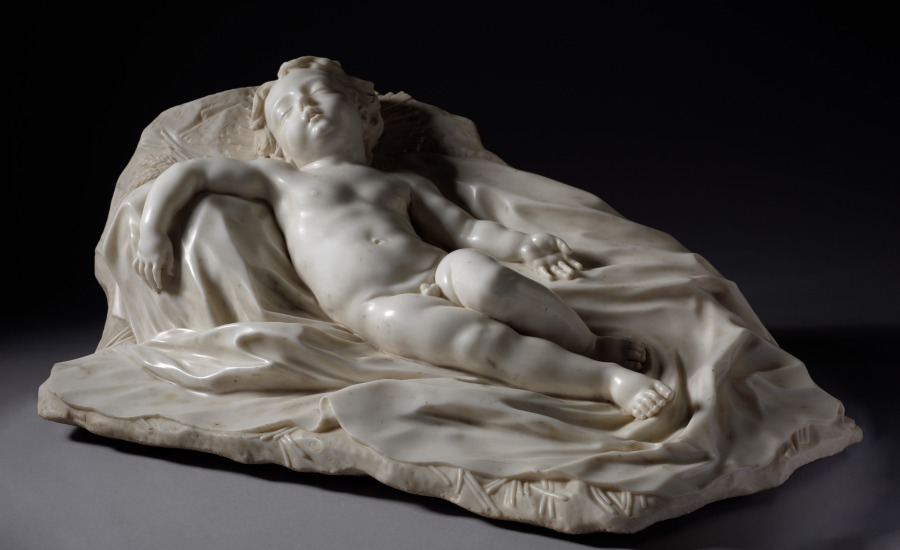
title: Sleeping Christ Child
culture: Italy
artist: Filippo Parodi (Italian, 1630–1702)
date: c. 1675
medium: marble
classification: Sculpture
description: Christ—no longer an infant, but a young child—sprawls on a bed of straw, his head thrown back in slumber and his right arm dangling. The simple radiance framing his head indicates his divinity. Representations of the sleeping Christ child were enduringly popular, not only because of the subject’s inherent charm, but sleep, as a metaphor for death, encouraged pious Christians to meditate on Christ’s humanity and his eventual suffering and death. Filippo Parodi’s Sleeping Christ Child beguiles with lifelike detail. Parodi used varying degrees of polish to differentiate surface textures: Christ’s body is burnished to a soft gleam, while his hair and the straw are more roughly carved, absorbing rather than reflecting the light. Parodi exploited the sensuous and tactile possibilities of the marble to enhance the emotional impact of his piece, a tactic learned from the master of Italian Baroque sculpture, Gianlorenzo Bernini.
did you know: Tender images of the Christ child sleeping encouraged devout Christians to meditate on Christ’s humanity.